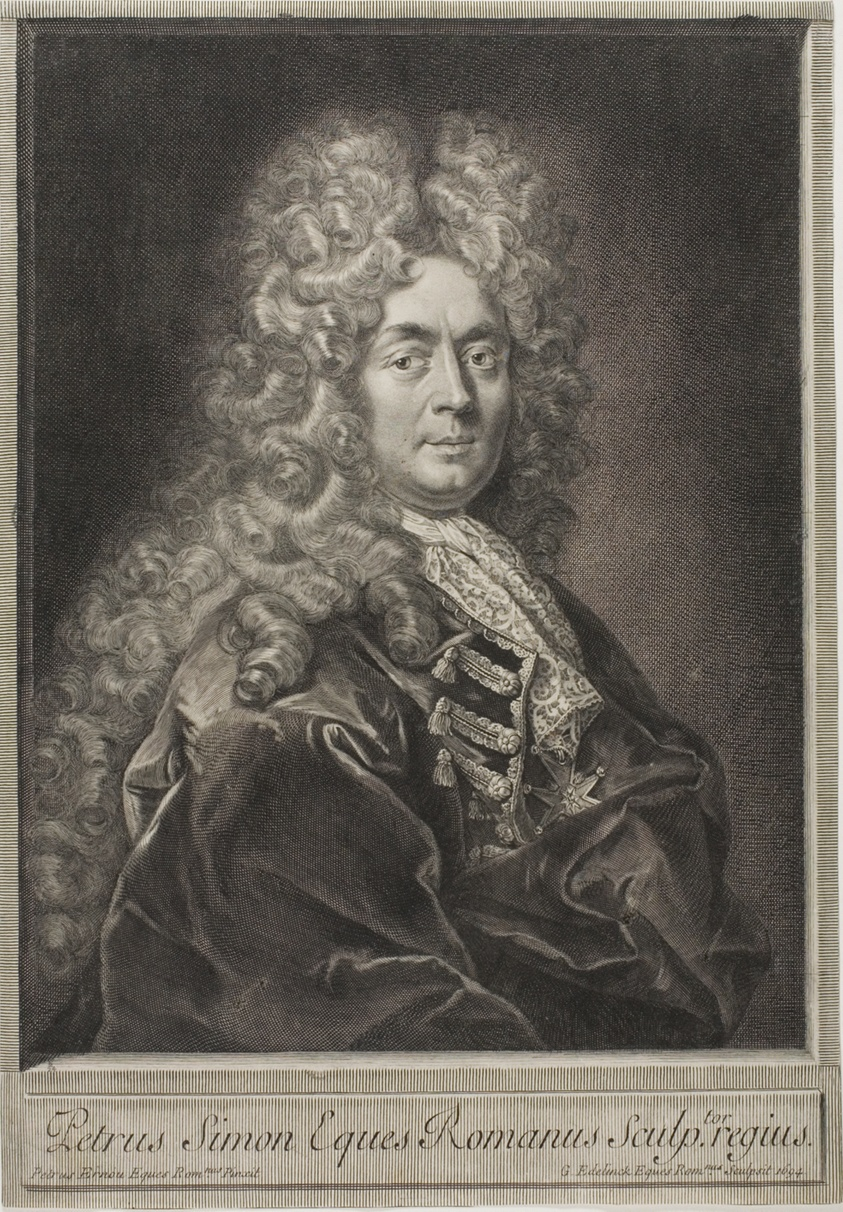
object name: Print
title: Pierre Simon, Engraver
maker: Gérard Edelinck (French, born Flanders, 1640-1707); after Pierre Simon (French, c. 1650-1710)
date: 1694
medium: Engraving on paper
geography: France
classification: engraving; prints and drawing; print